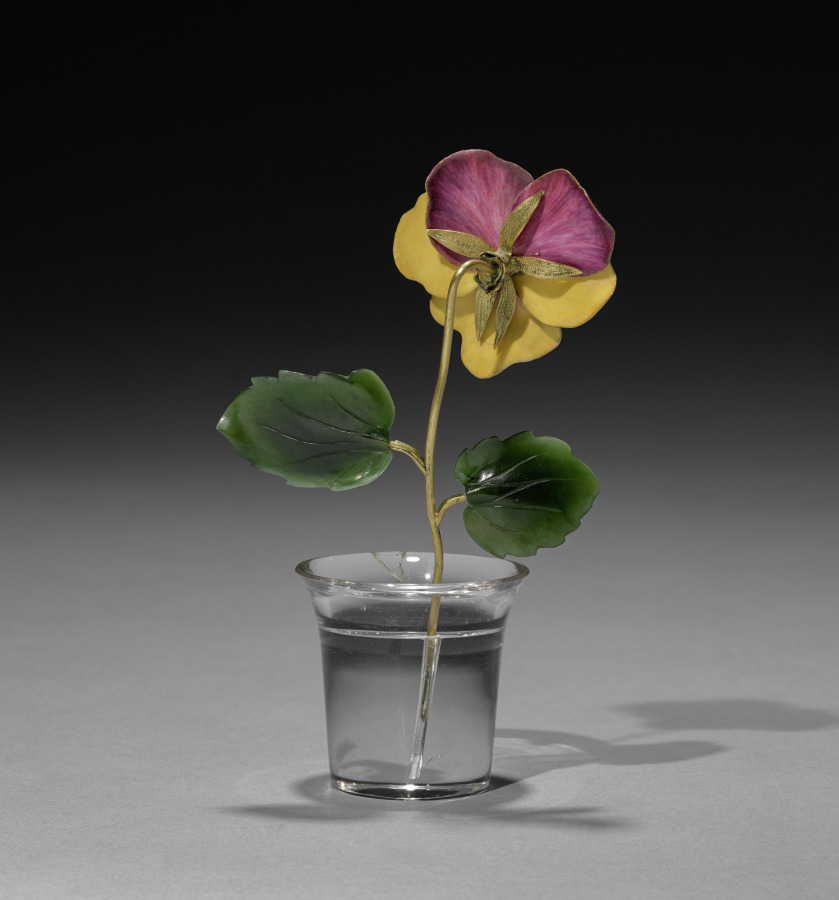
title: Flower Study of a Pansy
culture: Russia, St. Petersburg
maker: House of Fabergé (Russian, 1842–1918)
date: c. 1885–1915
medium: gold, jade, enamel, rock crystal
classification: Miscellaneous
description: This flower study depicts a pansy in bloom. Fabergé’s inspiration for his flower studies is said to have come from the floral brooches of precious stones that were made in the 1700s for Catherine the Great as well as from the Japanese art of flower arranging, known as ikebana. Small and delicate, Fabergé’s flower studies were given as intimate gifts to friends by the tsarina and others in the court. She also liked to take them around to wherever the imperial family was residing as a reminder of spring during the harsh Russian winters.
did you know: The stems of Fabergé’s flower studies are set into little basins carved from rock crystal to resemble pots of water.